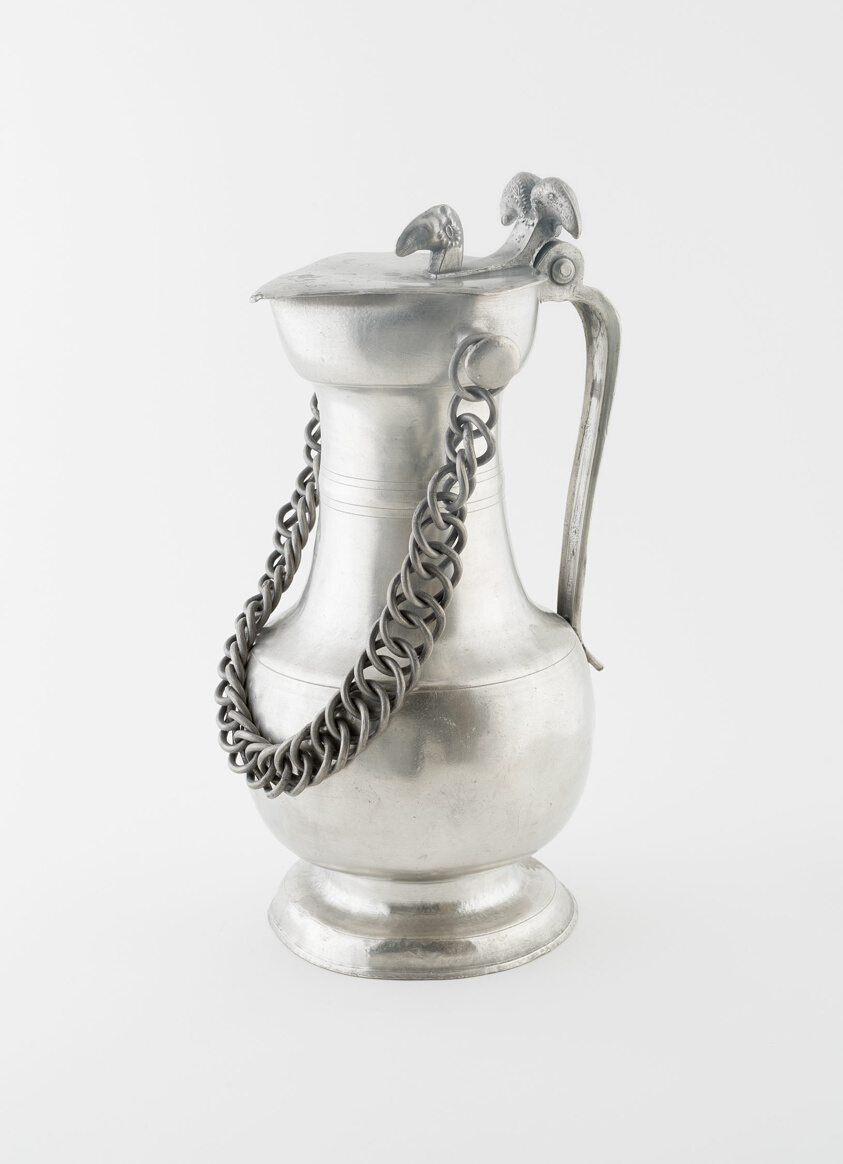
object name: Metalwork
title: Covered Flagon with Chain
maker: Giovanni del Barba; Swiss, active first half 19th century; Switzerland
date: c. 1845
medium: Pewter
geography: Valais canton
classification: pewter; metalwork; european decorative arts